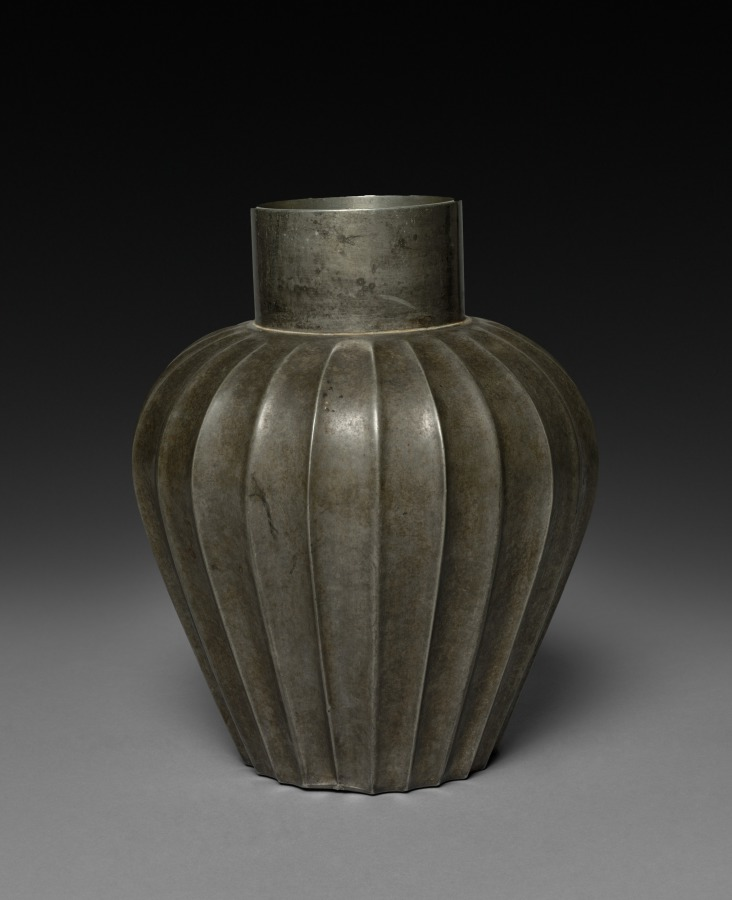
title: Jar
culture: Japan, Edo period (1615–1868)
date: 1600s-1800s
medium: pewter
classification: Metalwork